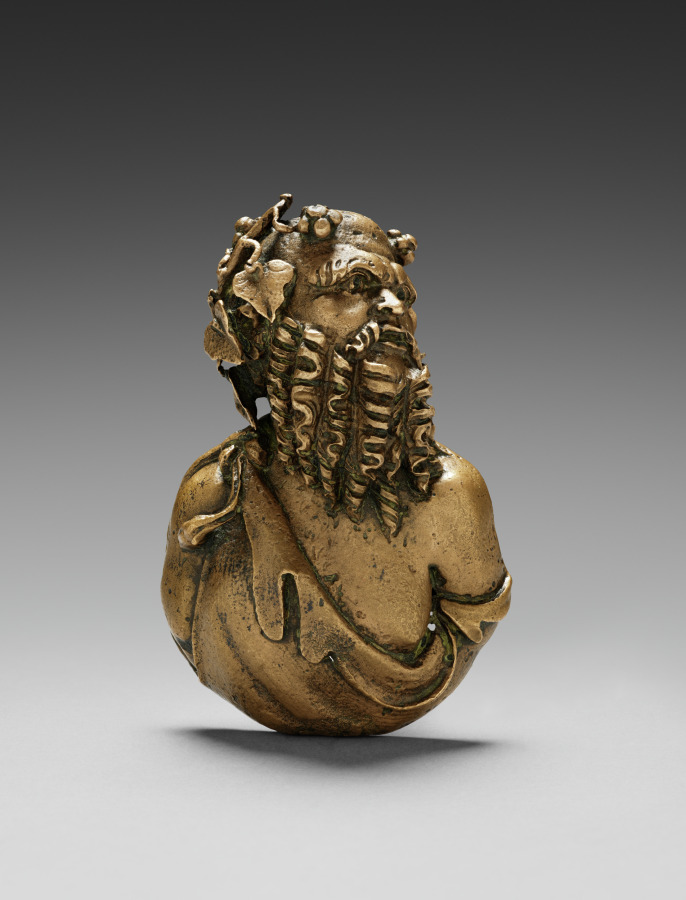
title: Silenus Bust for a Couch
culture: Italy, Roman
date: 1–125 CE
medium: bronze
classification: Sculpture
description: This bust of Silenus was part of the fulcrum or armrest of an ancient Roman couch. Silenus was the tutor and companion of Bacchus, the Roman god of wine. He is shown with a long curly beard, bushy eyebrows, and wearing a garland of ivy vines with berries. His deerskin robe, tied by the animal’s hoof, falls off his shoulder, suggesting drunkenness. The bust would have been placed at the base of the armrest where it met the seat of the couch, while an animal head likely decorated the top. As is the case with many Roman objects, Romans adapted their couch style and decoration from the Greeks.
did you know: This silenus’s beard is made up of exactly ten ringlets of curls.